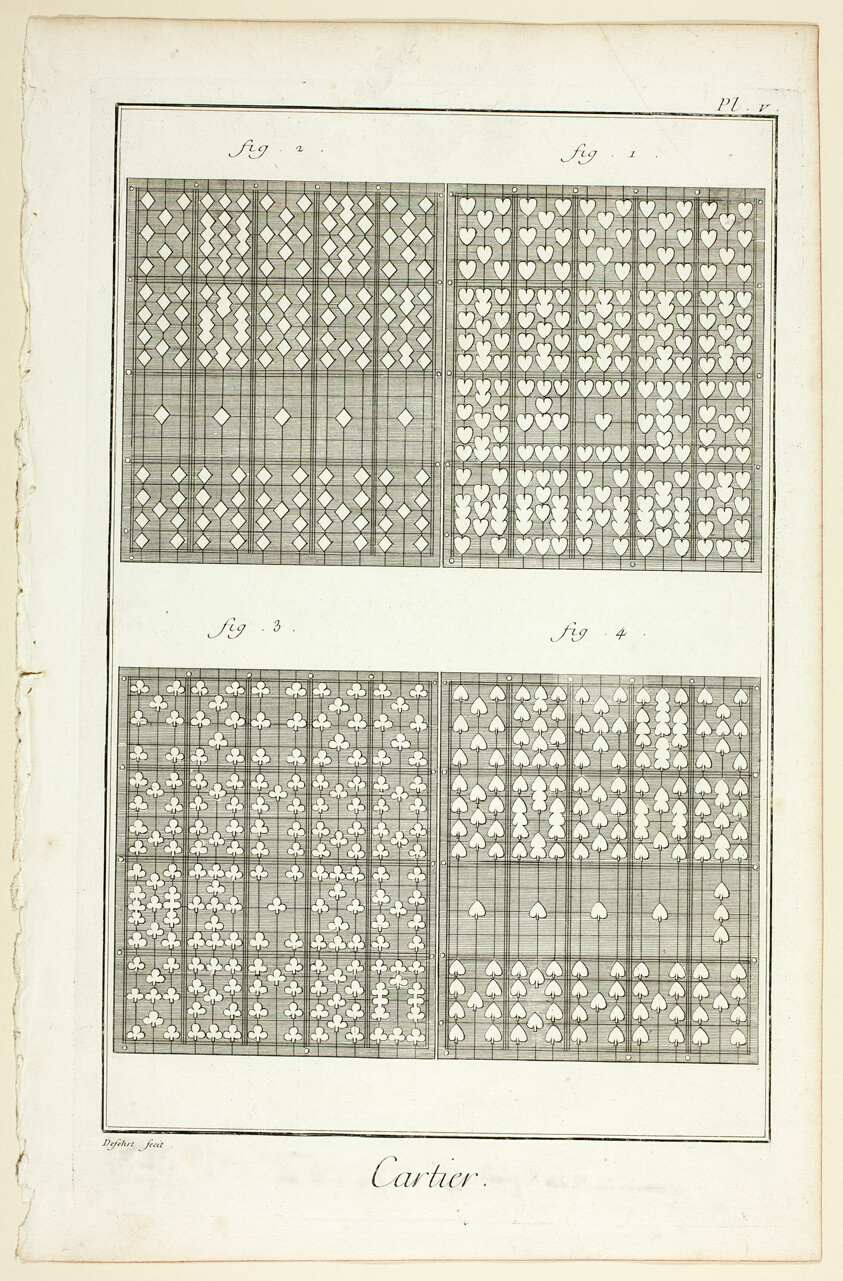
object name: Print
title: Card-Maker, from Encyclopédie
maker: A. J. Defehrt (French, active 18th century); published by André le Breton (French, 1708-1779), Michel-Antoine David (French, c. 1707-1769), Laurent Durand (French, 1712-1763), and Antoine-Claude Briasson (French, 1700-1775)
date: 1762/77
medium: Etching, with engraving, on cream laid paper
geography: France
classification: etching; print; prints and drawing